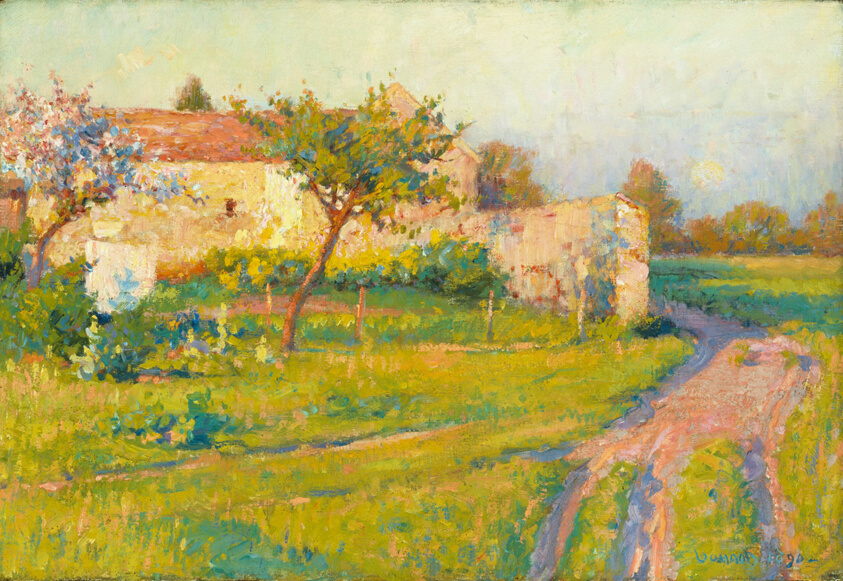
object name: Painting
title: Spring in France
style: Impressionism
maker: Robert William Vonnoh (American, 1858–1933)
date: 1890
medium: Oil on canvas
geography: France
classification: painting; american arts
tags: landscapes